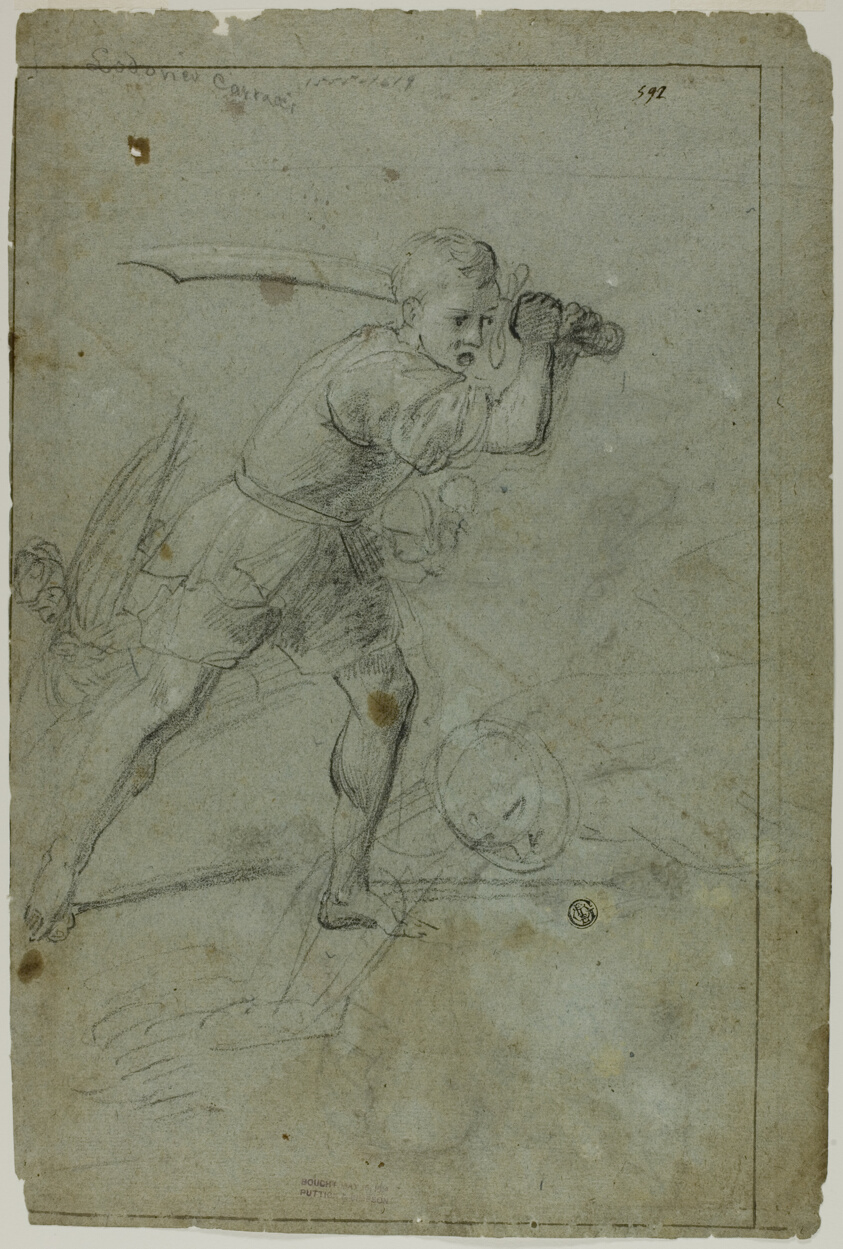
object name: Drawing and Watercolor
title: David Beheading Goliath (recto); Sketch of Draped Female Figure with Right Arm Raised Above Head (verso)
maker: Probably Domenico Fiasella (Italian, 1589-1669); or possibly Lodovico Carracci (Italian, 1555-1619)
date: n.d. (recto); c. 1621 (verso)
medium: Black chalk, heightened with white chalk (recto and verso), on blue laid paper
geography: Italy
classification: drawings (visual works); prints and drawing